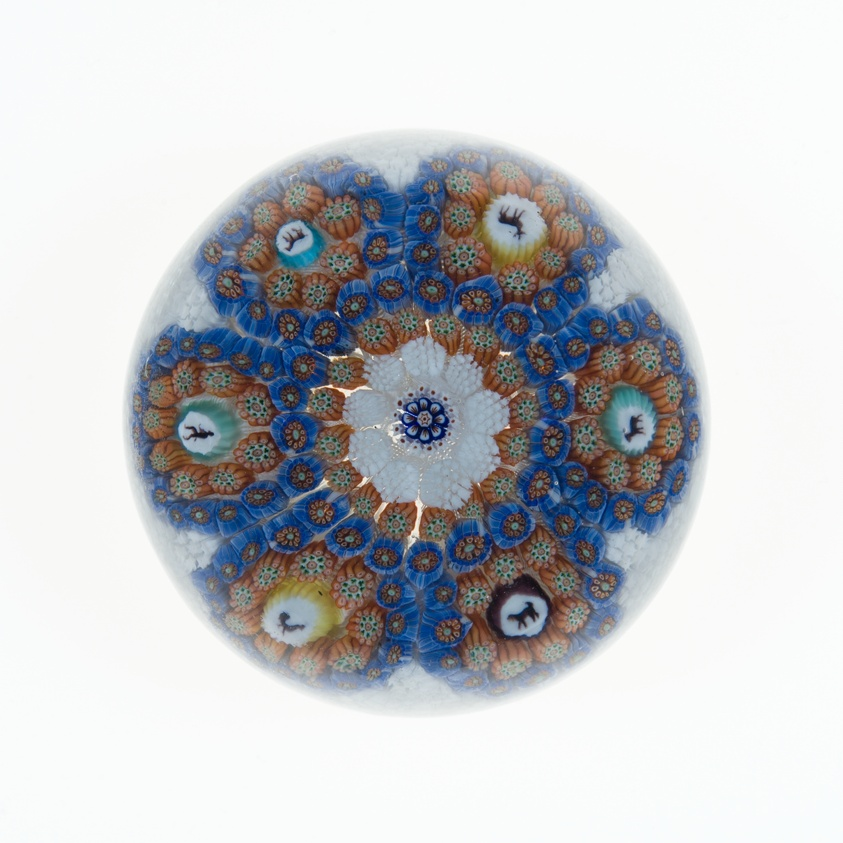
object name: Glass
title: Paperweight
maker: Baccarat Glassworks (Cristalleries de Baccarat); Lorraine, France, founded 1764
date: c. 1846–55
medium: Glass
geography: Lunéville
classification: paperweight; millefiori; european decorative arts; glass